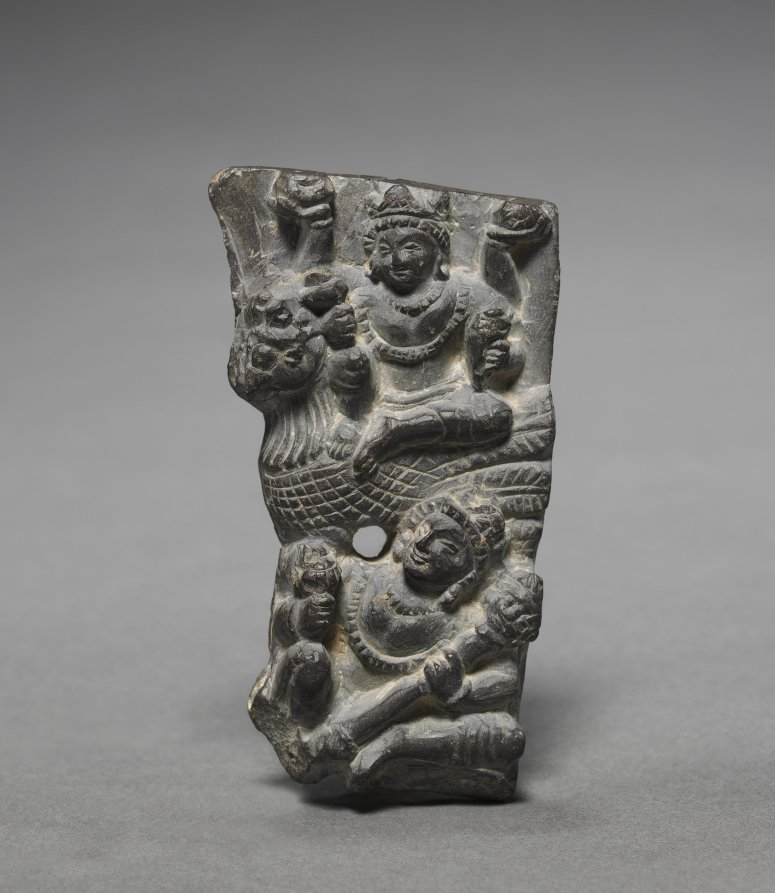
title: Vishnu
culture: India, Kashmir, 8th century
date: 700s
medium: steatite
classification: Sculpture